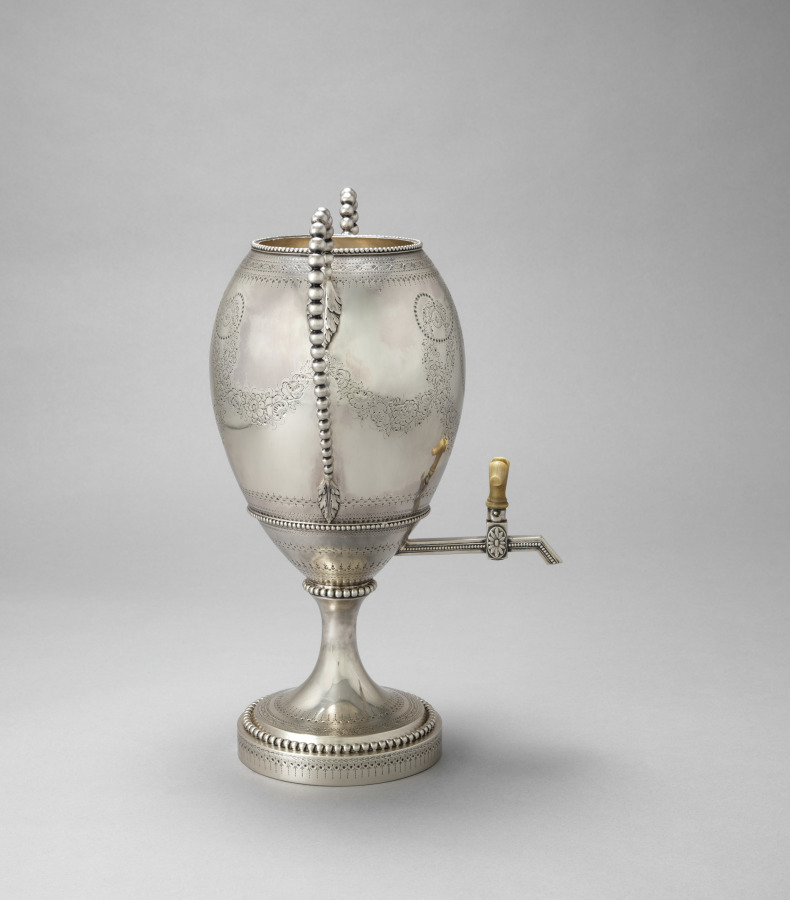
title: Tea Urn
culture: England, London, 18th century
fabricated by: Henry Greenway (British)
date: 1781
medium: silver and ivory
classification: Silver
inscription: engraved on body: coat of arms-- tower surrounded by three covered cups; crest consisting of a squirrel. Engraved on cover: crest consisting of a squirrel (coat of arms of Amcotts family).